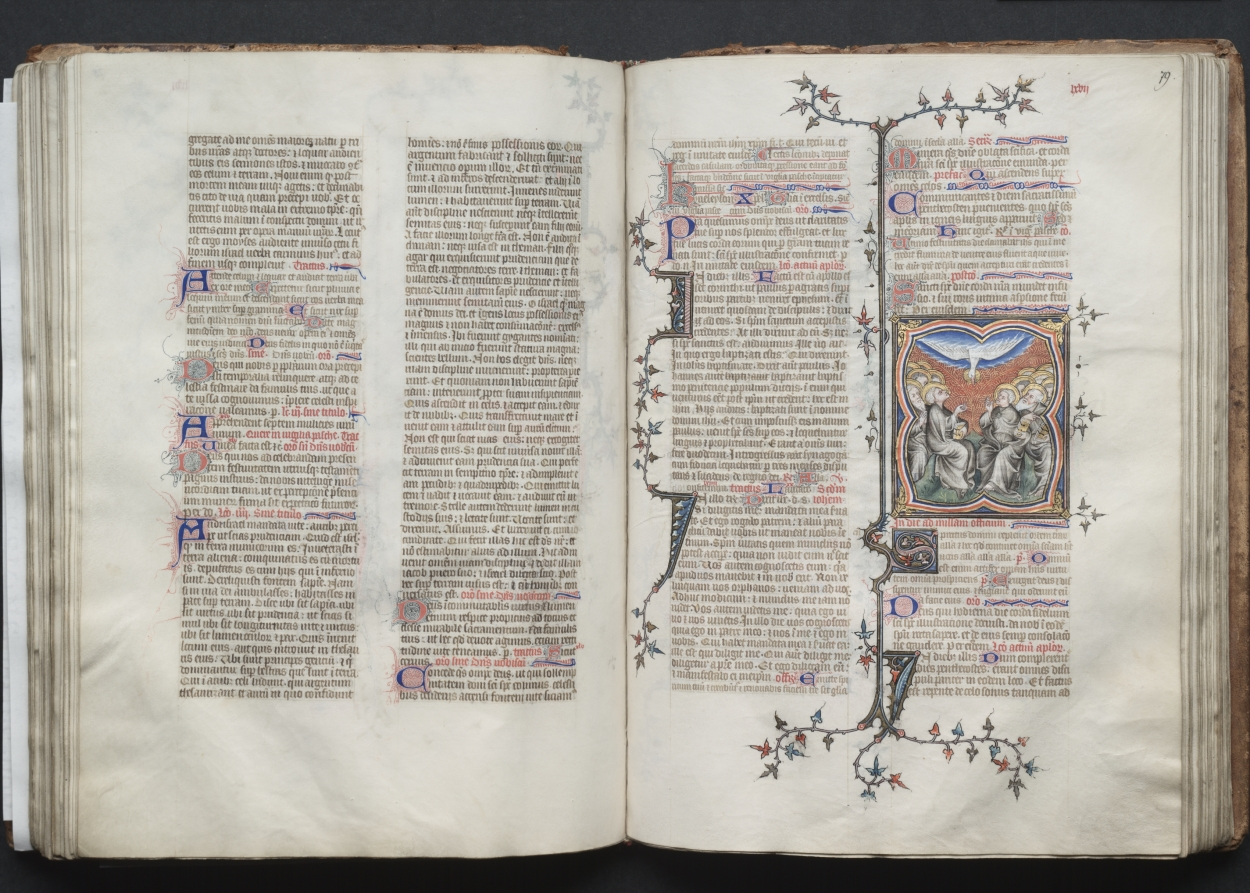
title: The Gotha Missal: Fol. 78v, Text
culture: France, Paris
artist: Master of the Boqueteaux (French)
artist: and Workshop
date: c. 1375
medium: ink, tempera, and gold on vellum; blind-tooled leather binding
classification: Bound Volume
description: The style and quality of this manuscript's decoration is typical of deluxe Parisian books made for aristocratic or royal patrons. Most of the book's decoration appears to be the work of the Master of the Boqueteaux, an artist active at the court of King Charles V (died 1380). His style was apparently shared by a number of book illuminators working in and around Paris. It is very possible that the Gotha Missal belonged to Charles V, but is not provable because the manuscript has no royal portraits and lacks a colophon. Given the book's magnificent decoration, however, it would seem that it was produced for a Valois prince, if not for the king himself. The manuscript receives its name from the German dukes of Gotha, its later owners.